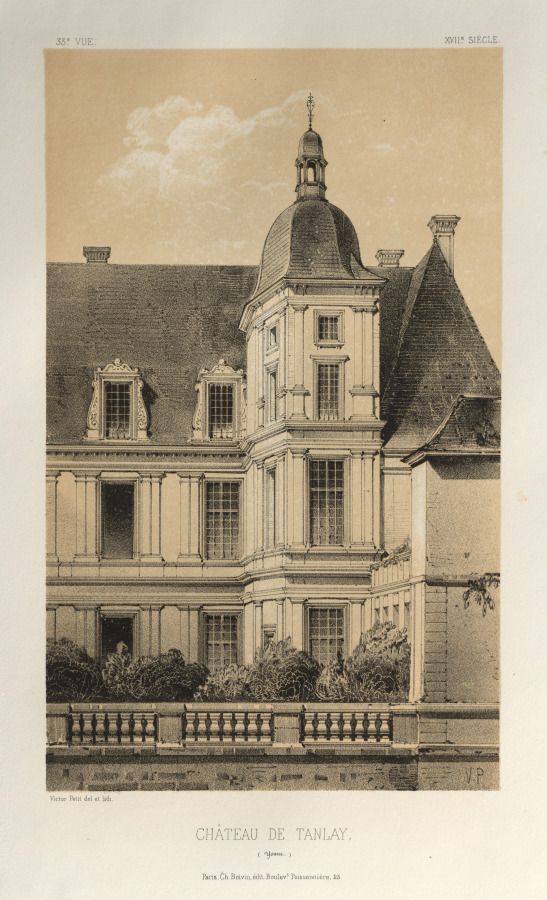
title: Architecture Pittoresque ou Monuments des xveme. Et xvieme. Siecles: Chateaux De France des XV et XVI Siecles: Pl. 33, Château De Tanlay (Yonne)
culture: France, 19th century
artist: Victor Petit (French, 1817–1874)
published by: Charles Boivin (publisher and editor); Lith de Godard a Paris (printer)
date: 1860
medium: lithograph with tint stone, from portfolio of 100 lithographs with tint stone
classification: Print